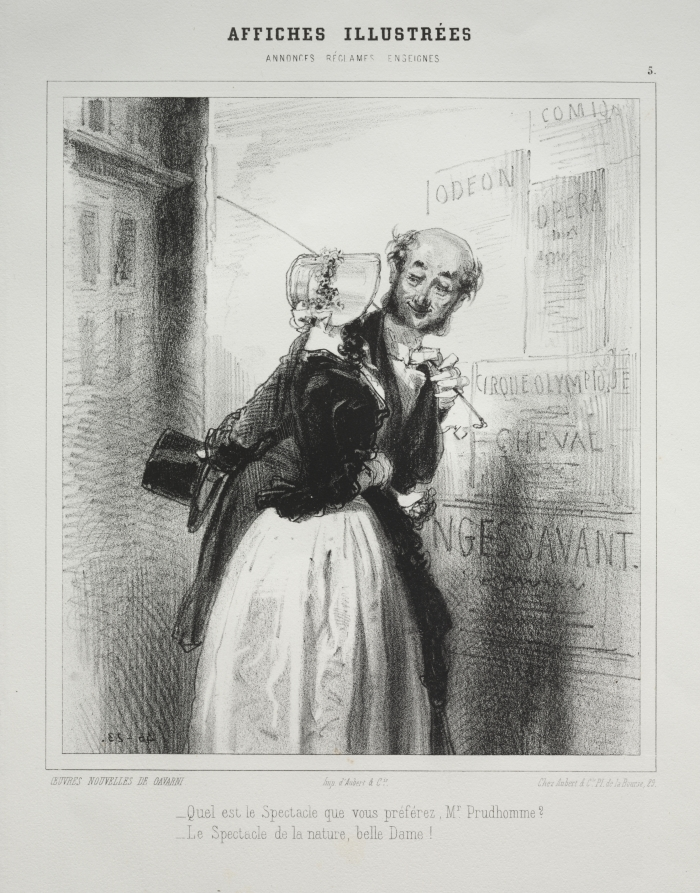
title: Affiches Illustrées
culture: France, 19th century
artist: Paul Gavarni (French, 1804–1866)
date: c. 1844–46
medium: lithograph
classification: Print